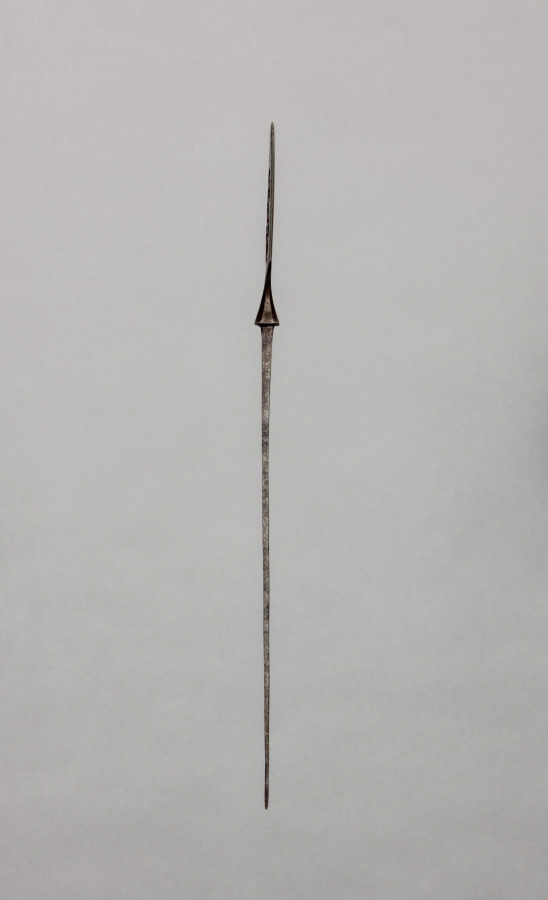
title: Arrow Point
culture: Japan, Edo period (1615–1868)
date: 1700s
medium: steel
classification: Arms and Armor